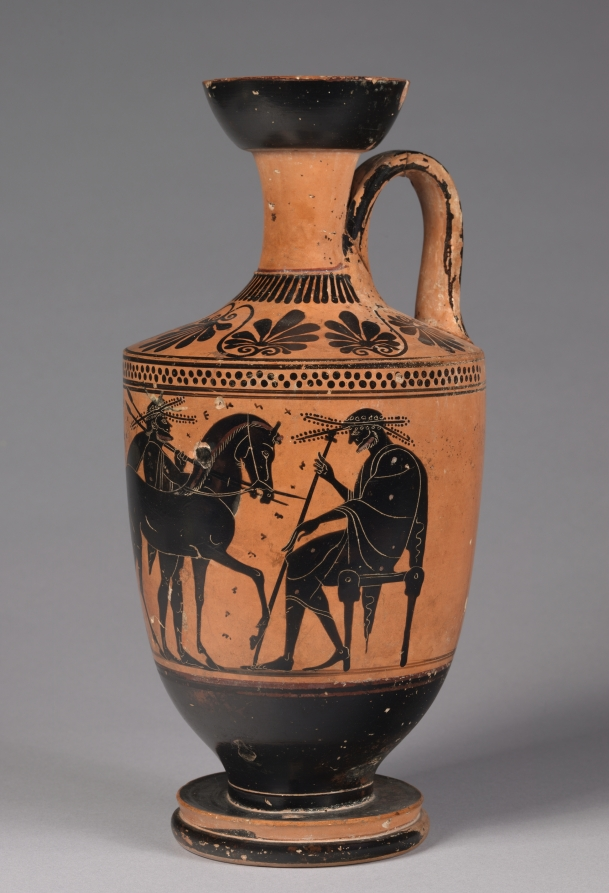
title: Black-Figure Lekythos (Oil Vessel): Seated Men, Warriors and Horse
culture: Greek, Attic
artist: attributed to Leagros Group (Greek, Attic, active c. 520–500 BCE)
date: c. 510–500 BCE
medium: ceramic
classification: Ceramic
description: Four men decorate the body of this sturdy oil vessel, perhaps in a scene of homecoming. Unlike on later, white-ground lekythoi, the painter has used white only as an accent—now faded—on the shield and the clothing and broad-brimmed hats of some of the men. The letters scattered across the background do not spell any recognizable Greek words, perhaps suggesting an illiterate painter and/or clientele.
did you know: As usual for lekythoi painted by the Leagros Group, seven palmettes decorate the shoulder.